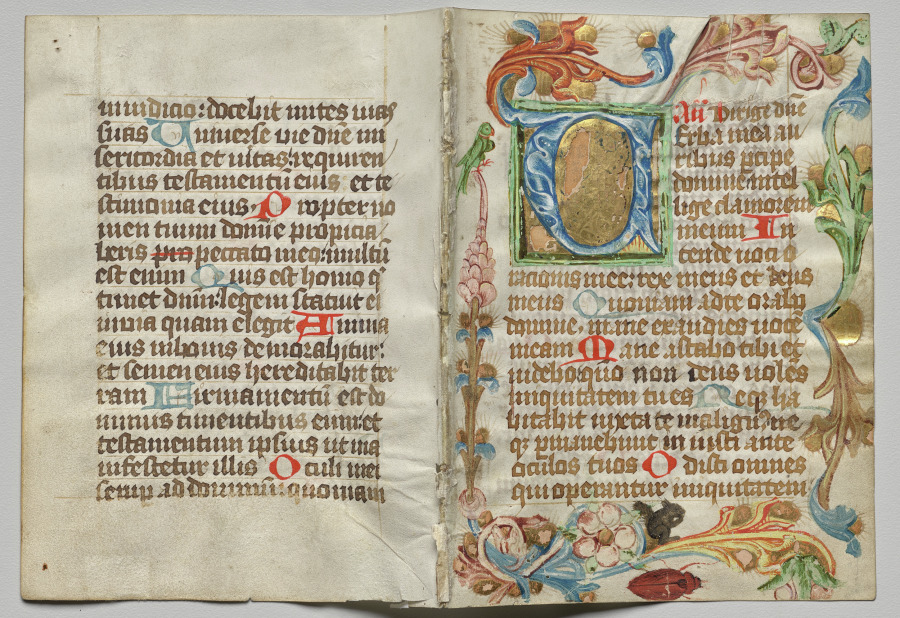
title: Bifolio from a Book of Hours: Initial V with Floral Border (recto)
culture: Austria (? ) or Bohemia (?), 15th century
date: c. 1460–1500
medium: ink, tempera and gold on vellum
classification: Manuscript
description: The word dirge, today meaning a mournful hymn for funerals, comes from the opening Latin in the Office of the Dead, seen just after the decorative letter A at upper left. During the Middle Ages, dirge became the shortened way to refer to the Office of the Dead. Although primarily recited at funerals, the office was also prayed at home as a reminder of mortality and a protection against sudden death. Surrounding the text, which contains Psalm 5, is a border decoration of acanthus leaves, believed to grow in paradise, as well as a parrot, a squirrel, a beetle, and flowers.